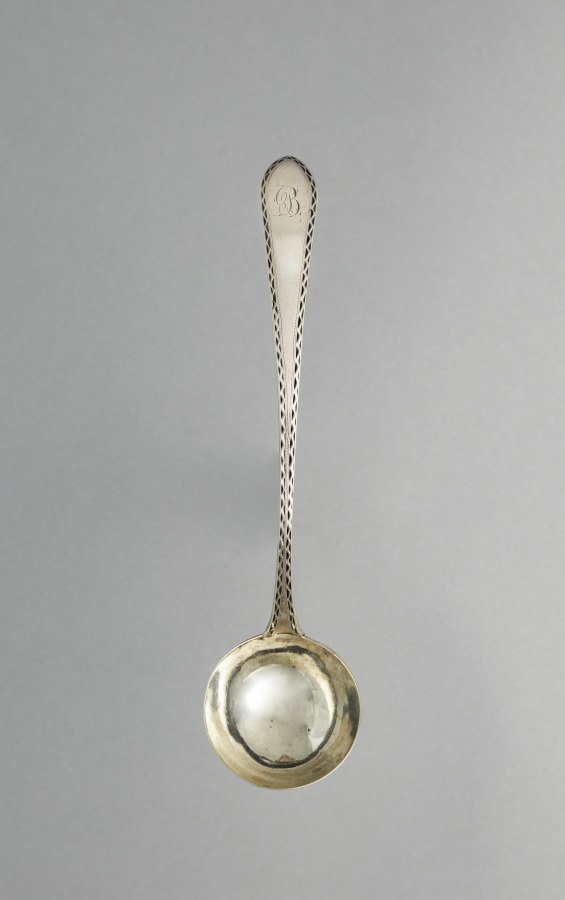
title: Ladle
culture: America, Maryland, Baltimore, late 18th Century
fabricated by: George Aiken (American, 1765–1832)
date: c. 1790–1800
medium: silver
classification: Silver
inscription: engraved "B" in bright-cut script on top of handle end.